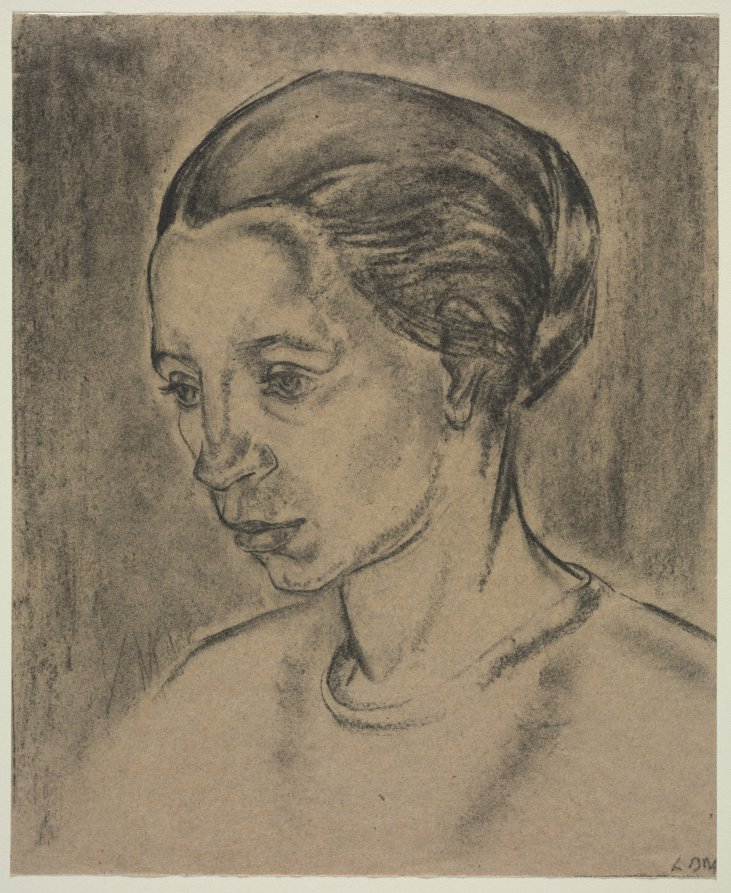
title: Elena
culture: America, Ohio, Cleveland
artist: Louise B. Maloney (American, 1887–1973)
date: c. 1910–25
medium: charcoal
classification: Drawing